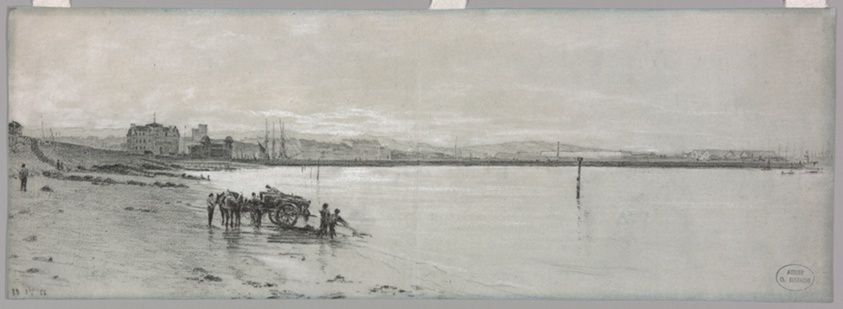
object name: Drawing and Watercolor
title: Seaside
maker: Charles François Eustache (French, 1820-1870)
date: 1866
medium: Black and white chalk on blue wove paper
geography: France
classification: drawings (visual works); chalk; paper; prints and drawing